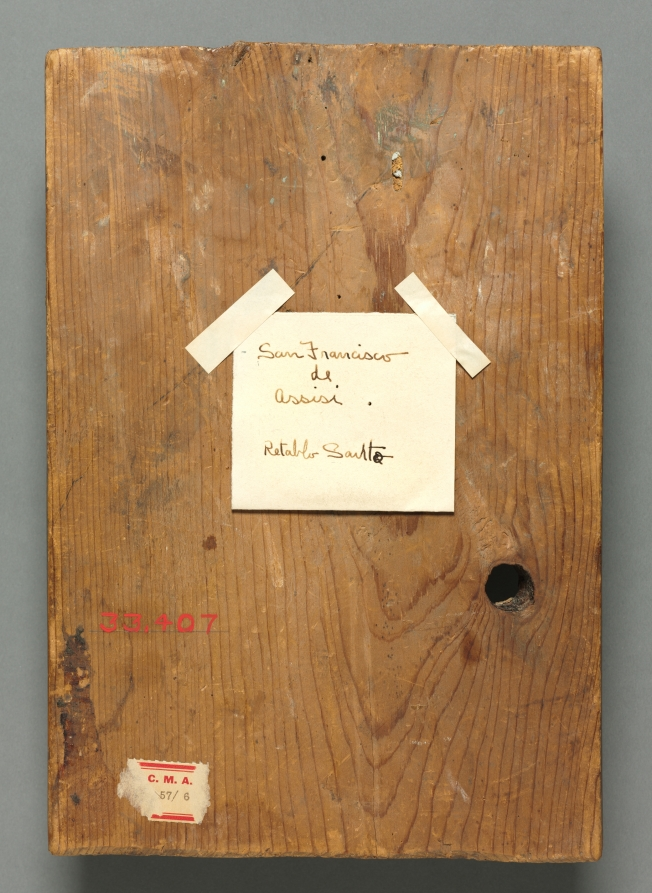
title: San Francisco de Assisi: santo de retablo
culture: America, New Mexico, 17th-18th century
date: 1600s-1700s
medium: oil on wood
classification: Painting